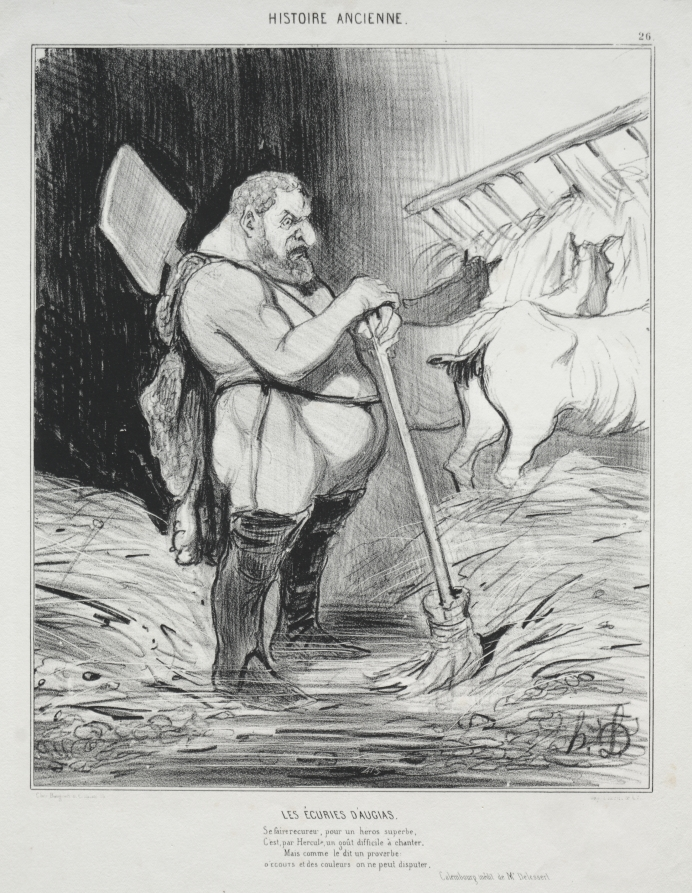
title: The Stable of Augeas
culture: France, 19th century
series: Ancient History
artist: Honoré Daumier (French, 1808–1879)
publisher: Aubert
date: 1842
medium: lithograph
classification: Print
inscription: Upper margin, in pencil: H.D. 1926 / L.D. 950 ; Lower margin, in pencil: L.D. III/III ; lower margin, printed: Chez Bauger, R. du Croissant, 16 / Imp. d'Aubert & Cie.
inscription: Above image, printed: HISTOIRE ANCIENNE. / 26 ; below image, printed: "LES ÉCURIES D'AUGIAS. / Se faire recureur, pour un héros superbe, / C'est par Hercule, un goût difficile à chanter. / Mais comme le dit un proverbe: / D'ÉGOUTS et des couleurs on ne peut disputer. / Calembourg inédit de Mr. Delessert."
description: This print was published in Le Charivari (September 25 , 1842) as plate 26 from the series Ancient History.